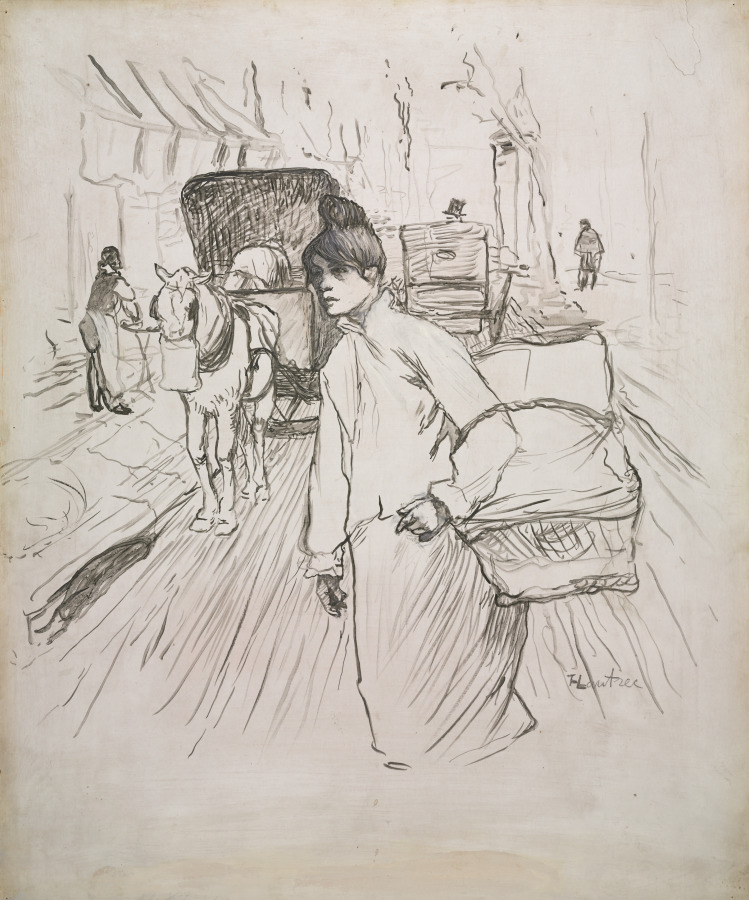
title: The Laundress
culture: France, 19th century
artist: Henri de Toulouse-Lautrec (French, 1864–1901)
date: 1888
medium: black and gray wash with white paint, scratched away in places, on gray cardboard prepared with white ground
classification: Drawing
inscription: signed, lower right, in brush and ink and black crayon: T-Lautrec; inscribed, on verso, upper center, in graphite: M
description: Henri de Toulouse-Lautrec produced this drawing to illustrate an article about Parisian summers. It presents the type of poorly paid worker who remained in the city while others traveled to escape the urban heat. Because the image was to be reproduced in black and white, Toulouse-Lautrec thinned and brushed ink, scraping into it to expose fine white highlights. Like several artworks in Cleveland’s collection, the drawing was formerly owned by Roger Marx, a French collector, curator, and art critic who built perhaps the most substantial holdings of Toulouse-Lautrec’s work around the turn of the century.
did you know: To create this drawing, Henri de Toulouse-Lautrec painted a board white and then both scraped the material away in areas and drew with black ink to create a variety of tones throughout the image.